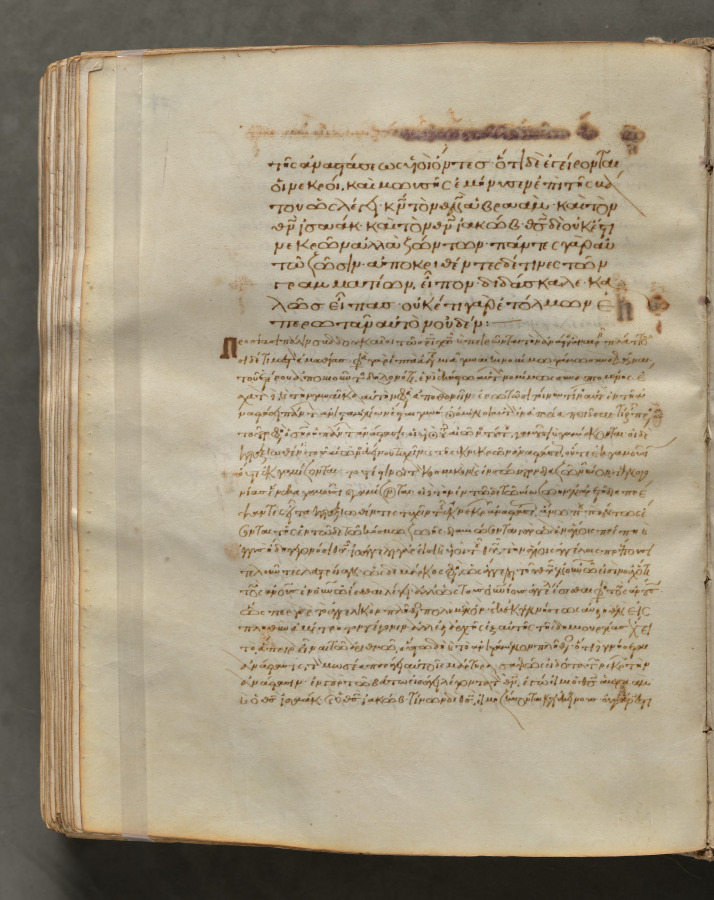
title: Text, folio 302 (verso), from a Gospel Book with Commentaries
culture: Byzantium, Constantinople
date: c. 1000–1100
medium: ink, tempera, and gold on vellum; leather binding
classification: Bound Volume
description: Each of the four gospels in this book opens on a page with brilliantly illuminated borders depicting the author of the text as well as birds—principally peacocks, symbols of the immortality of the soul—and fountains, representing the fountain of life and the salvation of the soul. This volume consists of 428 leaves with texts in Greek. Its level of sophistication suggests that it was probably written and decorated in a monastery in Constantinople.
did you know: Gospel books were carried in procession through Byzantine churches.